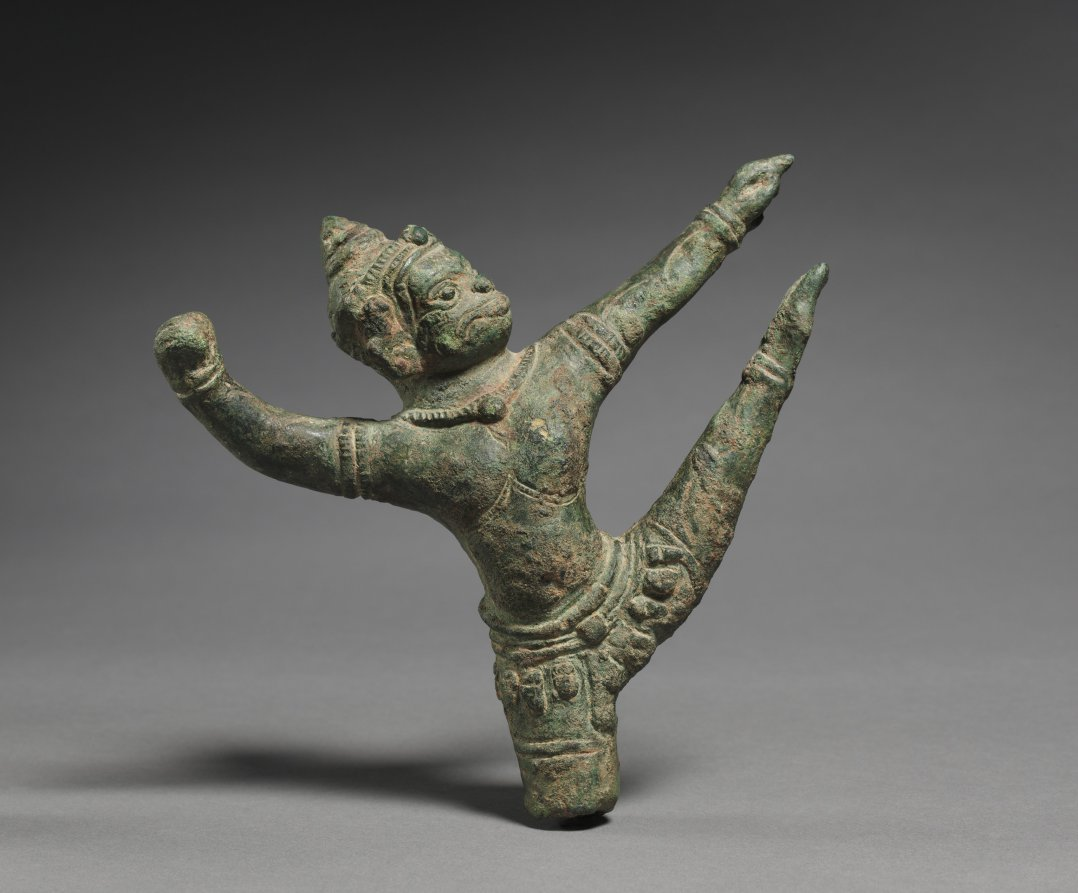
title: Hanuman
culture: Cambodia, Angkor, Bayon style, 12th Century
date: 1100s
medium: bronze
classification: Sculpture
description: When posed in this powerful and exuberant manner, the image of Hanuman stood at the top of a standard. As the son of the wind god and the most powerful of the primeval forest-dwellers, who are depicted with the head and tail of a monkey and the body of a man, Hanuman as an emblem spelled success in battle.